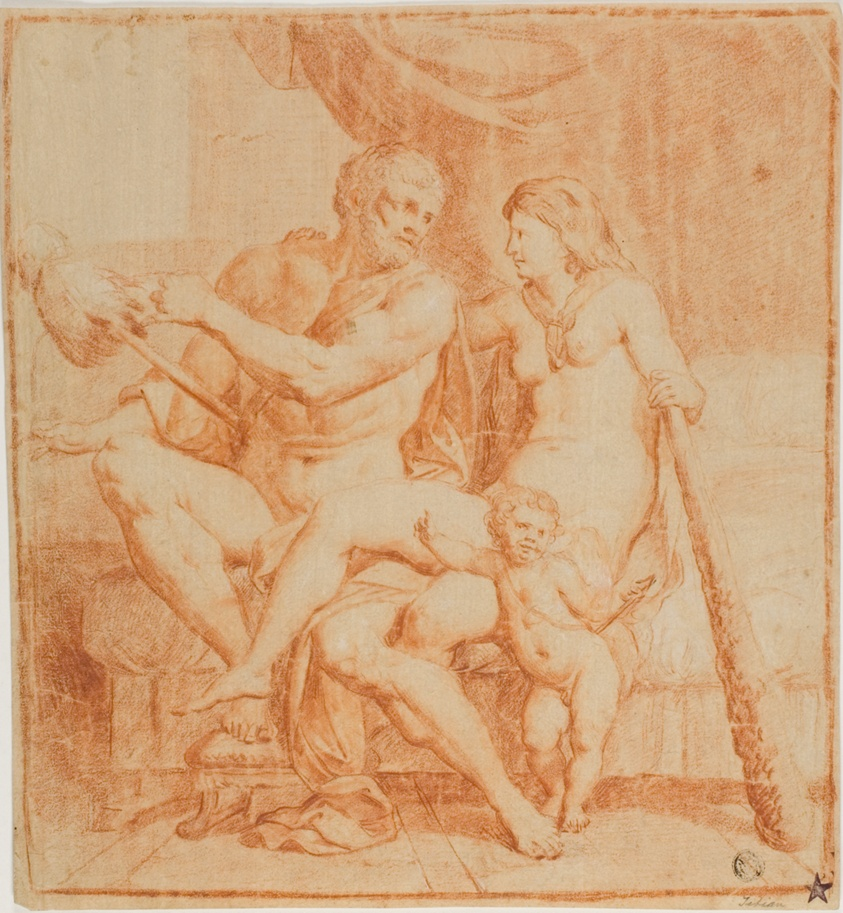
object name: Drawing and Watercolor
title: Hercules and Iole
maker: After Annibale Carracci; Italian, 1560-1609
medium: Red chalk and red chalk wash, heightened with traces of white, on cream laid paper prepared with tan ground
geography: Italy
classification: chalk; drawings (visual works); prints and drawing